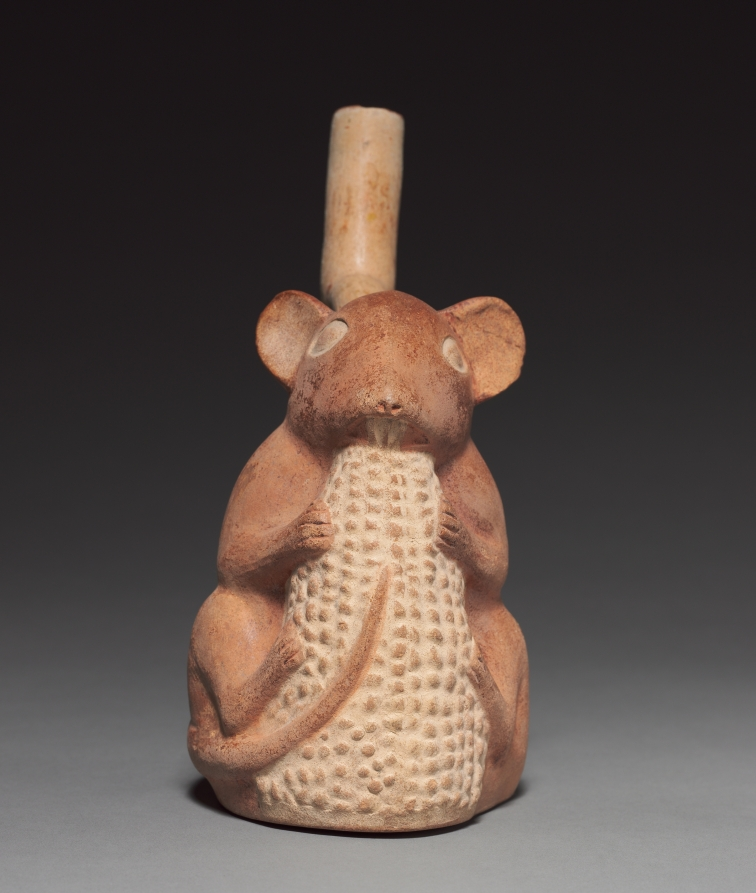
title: Rodent with Corn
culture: Peru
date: 50–800 CE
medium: pottery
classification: Ceramic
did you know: From the Moche, renowned for animal portraits, comes this rodent gnawing maize (corn).